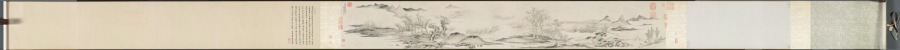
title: Water Village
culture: China, Ming dynasty (1368–1644)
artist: Wen Boren (Chinese, 1502–1575)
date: 1570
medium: handscroll; ink and light color on paper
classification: Painting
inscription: 隆慶庚午秋仿趙文敏筆. 五峰文伯仁 [印] 五峰山人; 文伯仁印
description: In the autumn of 1570, Wen Boren painted this seemingly unemotional scene of low-lying marshlands with a chain of rounded mountains in the background. A fishing boat is nestled on the shore near the village. Although paths and bridges traverse the landscape, only two people are visible in the stillness. From the restrained atmosphere of this landscape, one would never guess that Wen Boren was known as the “bad boy” of the Wu School for his explosive temper. As a younger man, he was even embroiled in a contentious lawsuit with his own uncle, Wen Zhengming (1470–1559), a master of Ming dynasty painting with whom he had trained. The ideal of the scholar-painter, or literati, was that an artist’s moral character is reflected in his paintings, so there was great incongruity between Wen Boren’s difficult personality and his restrained landscapes. A contemporary, Wang Shizhen, wrote this about him: "This gentleman is prone to behave odiously and screamed accusations at people. How is it possible for him to carry in his bosom such a wealth of scenic wonders?" Who knows what effort it took to subdue his fractious spirit to project an image of coolness and refined taste in his paintings?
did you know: A foreground tree has an eccentric twisting silhouette and pepper-dot "halo" of leaves.